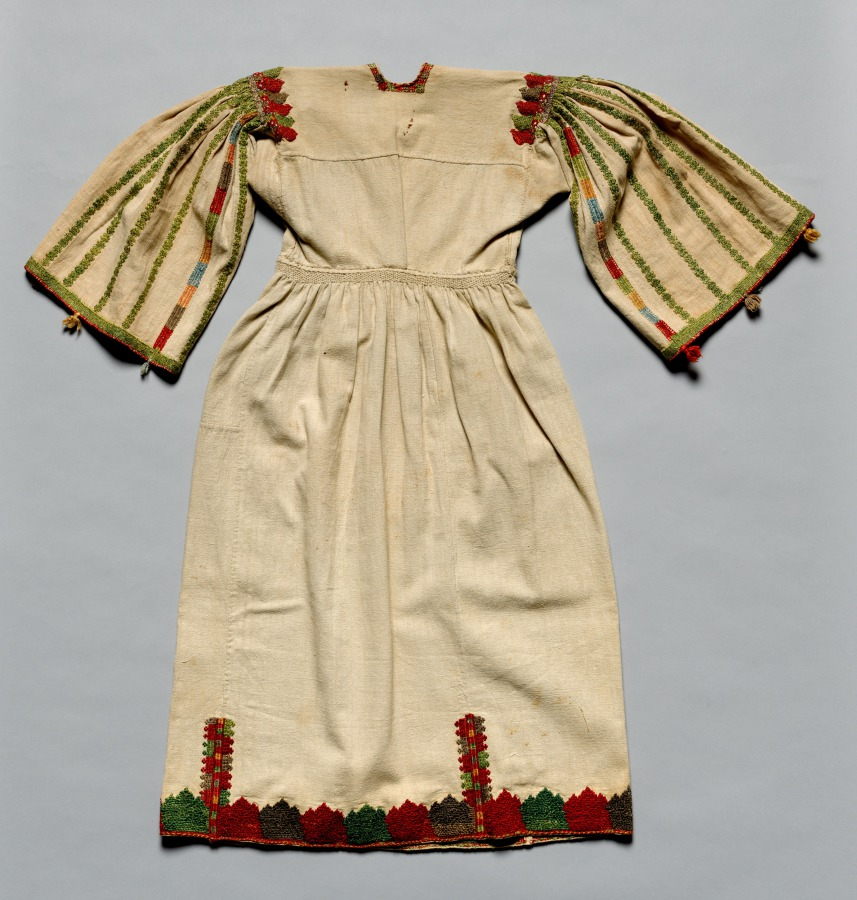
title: Woman's Dress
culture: Greece, Dodecanese Islands, Tilos ?, 18th century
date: 1700s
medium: embroidery; silk and gold filé on cotton tabby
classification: Embroidery